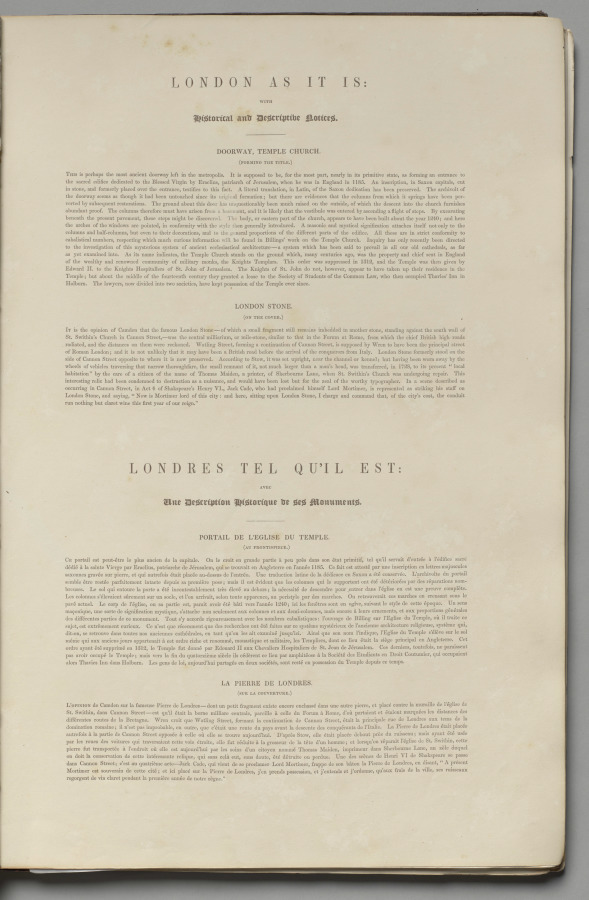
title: London As It Is: Doorway, Temple Church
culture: England, 19th century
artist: Thomas Shotter Boys (British, 1803–1874)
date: 1842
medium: lithograph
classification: Bound Volume